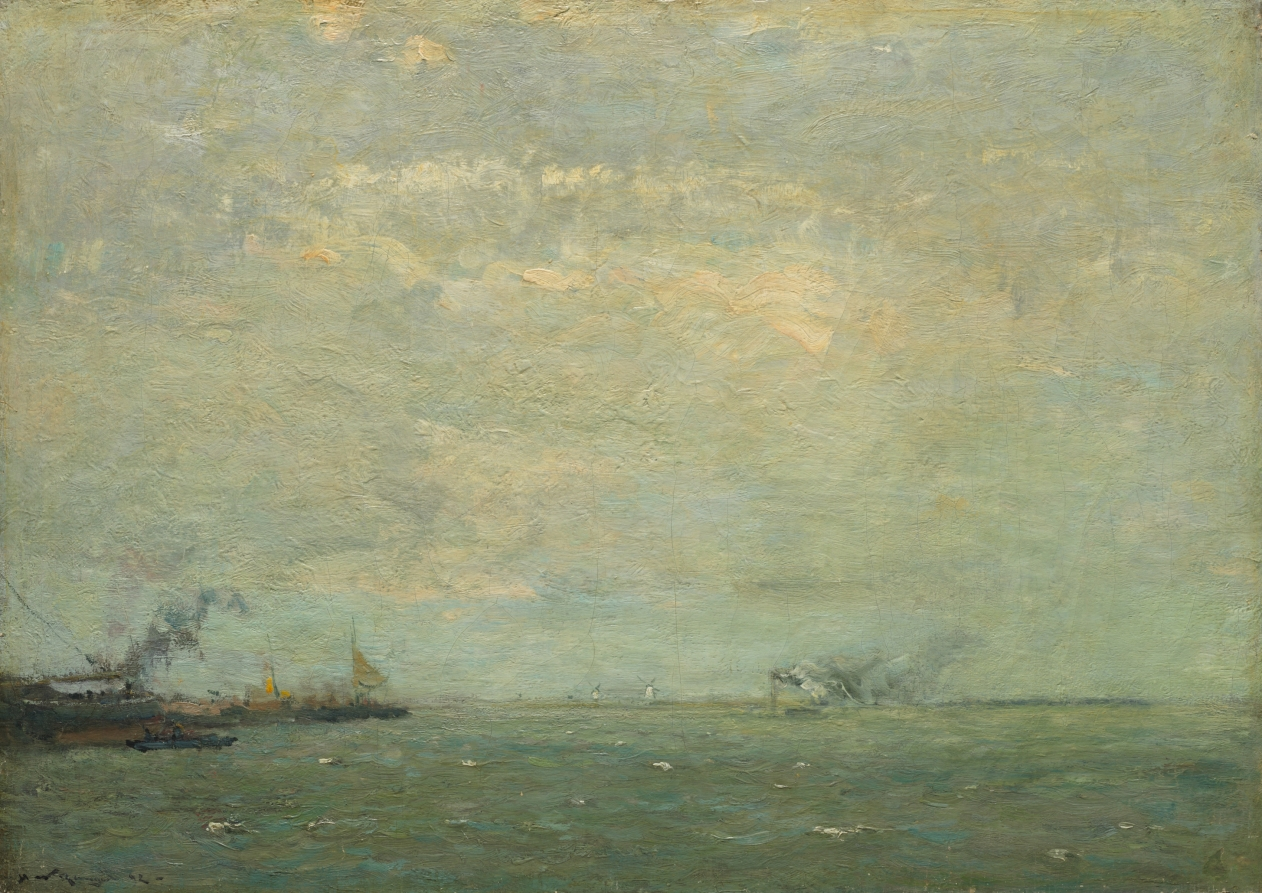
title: Seascape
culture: America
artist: Henry Ward Ranger (American, 1858–1916)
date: 1892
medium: oil on canvas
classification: Painting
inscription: Signed lower left: "Henry Ranger 92"